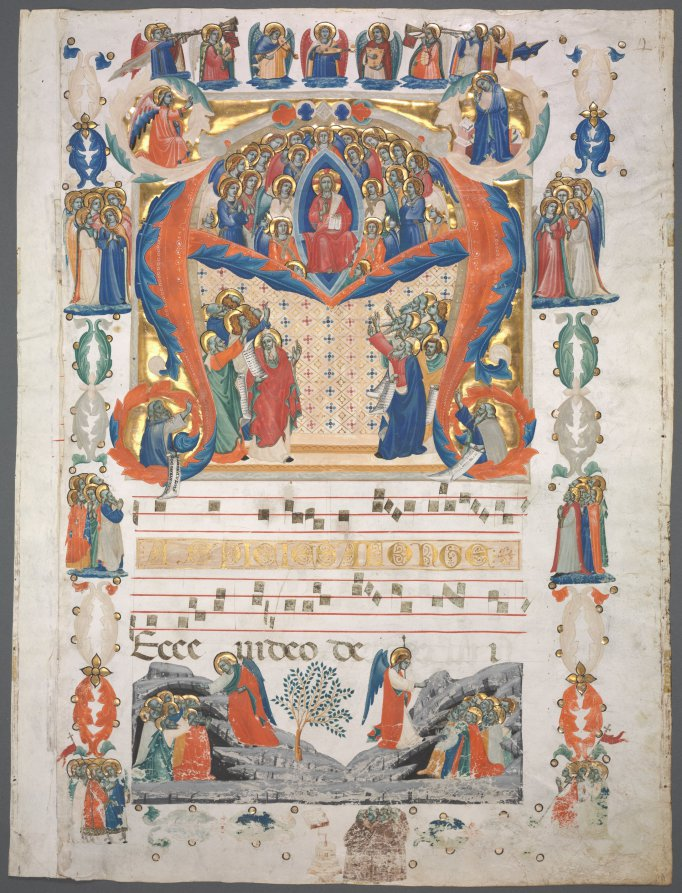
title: Single Leaf Excised from an Antiphonary: Inital A[spiciens a longe] with Christ in Majesty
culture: Italy, Tuscany or Umbria, 14th century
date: c. 1330–1350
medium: ink, tempera, and gold on vellum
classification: Manuscript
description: This massive historiated initial A, among the largest painted by Renaissance illuminators, introduces the matins response for the first Sunday in Advent. For centuries this particular Sunday was known as Aspiciens a longe Sunday, since this is the very first chant of the Christian liturgical year to be sung with a special choir, or Schola Cantorum, on that day. The text as well as the image follow the prophecy of Isaiah who foresaw the birth of Christ: Aspiciens a longe, ecce, video potentiam (Long had I been watching. Behold, now do I see God coming in power as in a cloud of light). Within the letter A, Christ is enthroned in majesty surrounded by angels and saints meant to represent the redeemer who is yet to come. The two figures who occupy the bottom curves of the A are Old Testament prophets; on the left is Isaiah who holds a scroll revealing his prophecy: “Behold, a Virgin can conceive.”